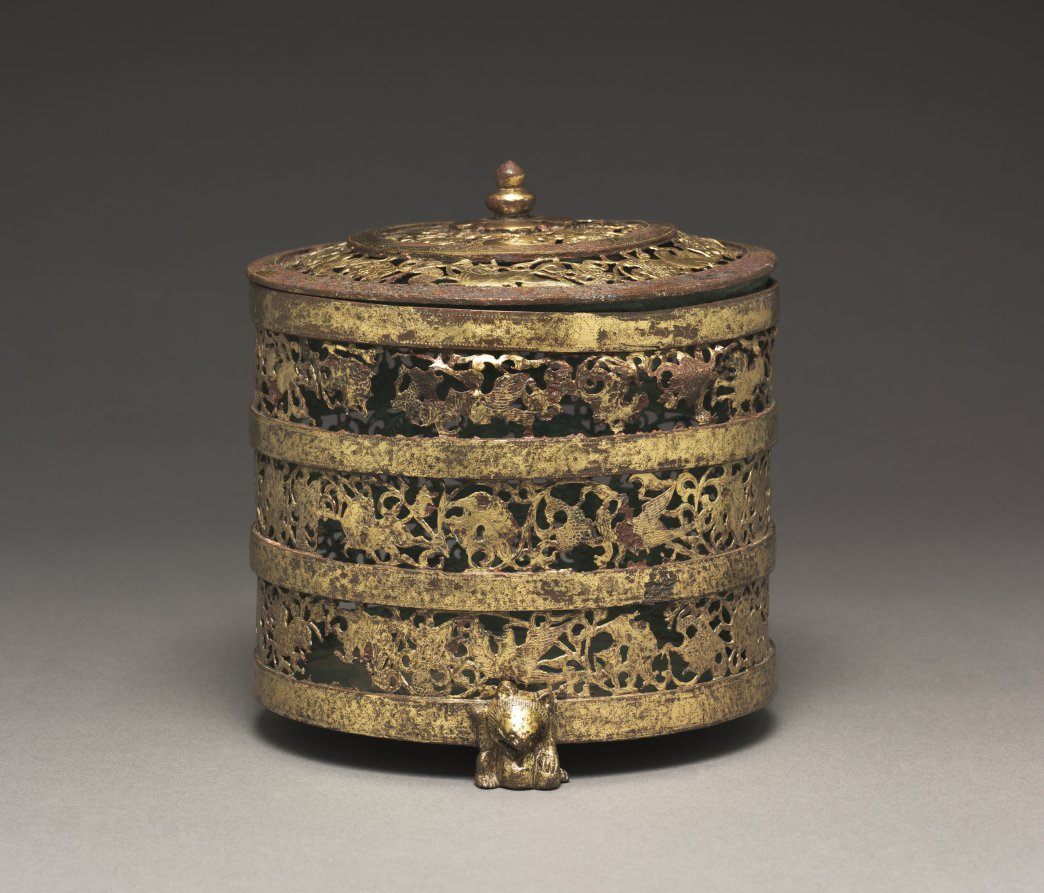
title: Cylindrical Container with Cover (Lian)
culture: China, Han dynasty (202 BCE–220 CE)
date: 100 BCE–100 CE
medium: gilt bronze with openwork and chased designs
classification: Metalwork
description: This magnificent gilded bronze vessel with openwork decoration shows all kinds of fabulous creatures, real and imaginary, chasing each other among swirling scrolls. There is an emphasis on the unbroken rhythms of movement, rather than the ferocity of animals in combat. Cylindrical bronze vessels in this shape, called lian, were often used as cosmetic boxes.